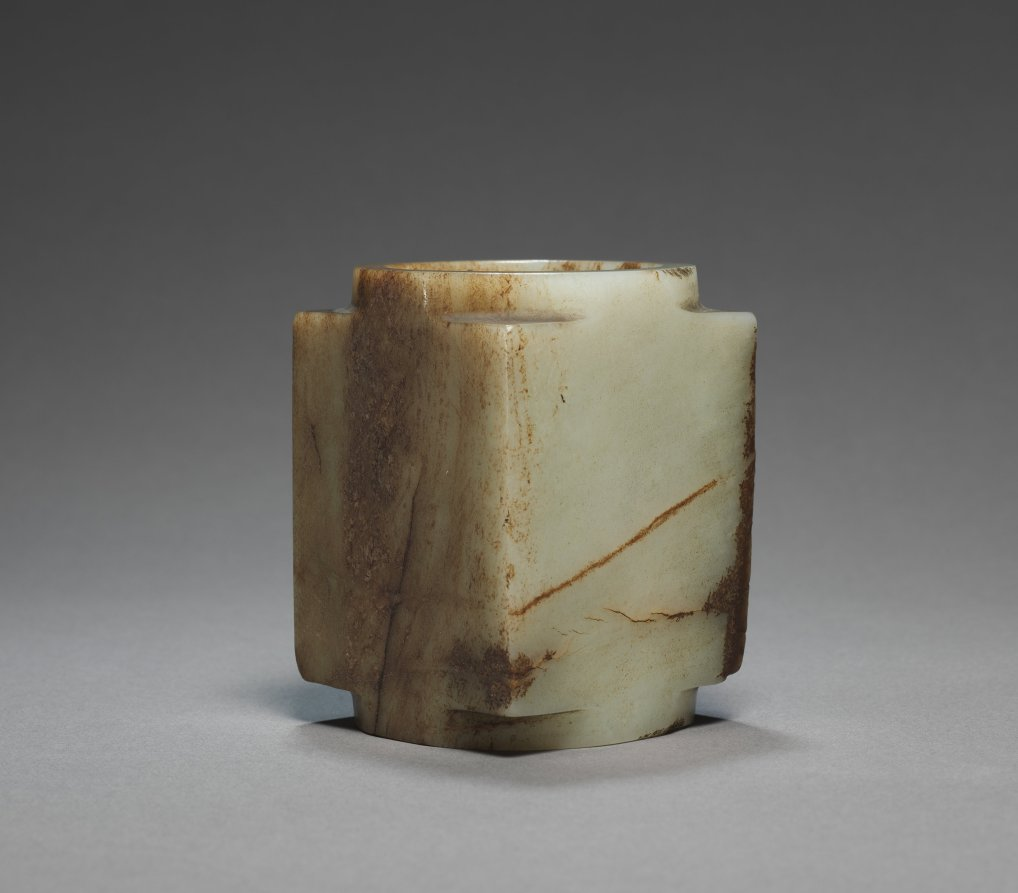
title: Cong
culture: China, Shang dynasty (c. 1600–c. 1046 BCE)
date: c. 1800–1400 BCE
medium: jade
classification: Jade